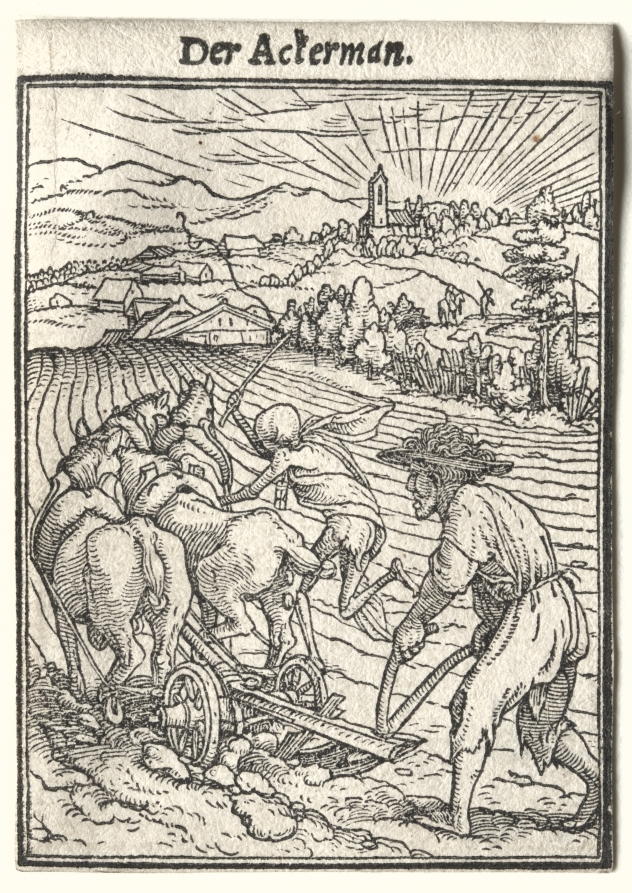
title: Dance of Death: The Ploughman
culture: Germany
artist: Hans Holbein the Younger (German, active England and Switzerland, 1497/98–1543)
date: ca. 1526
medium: woodcut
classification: Print